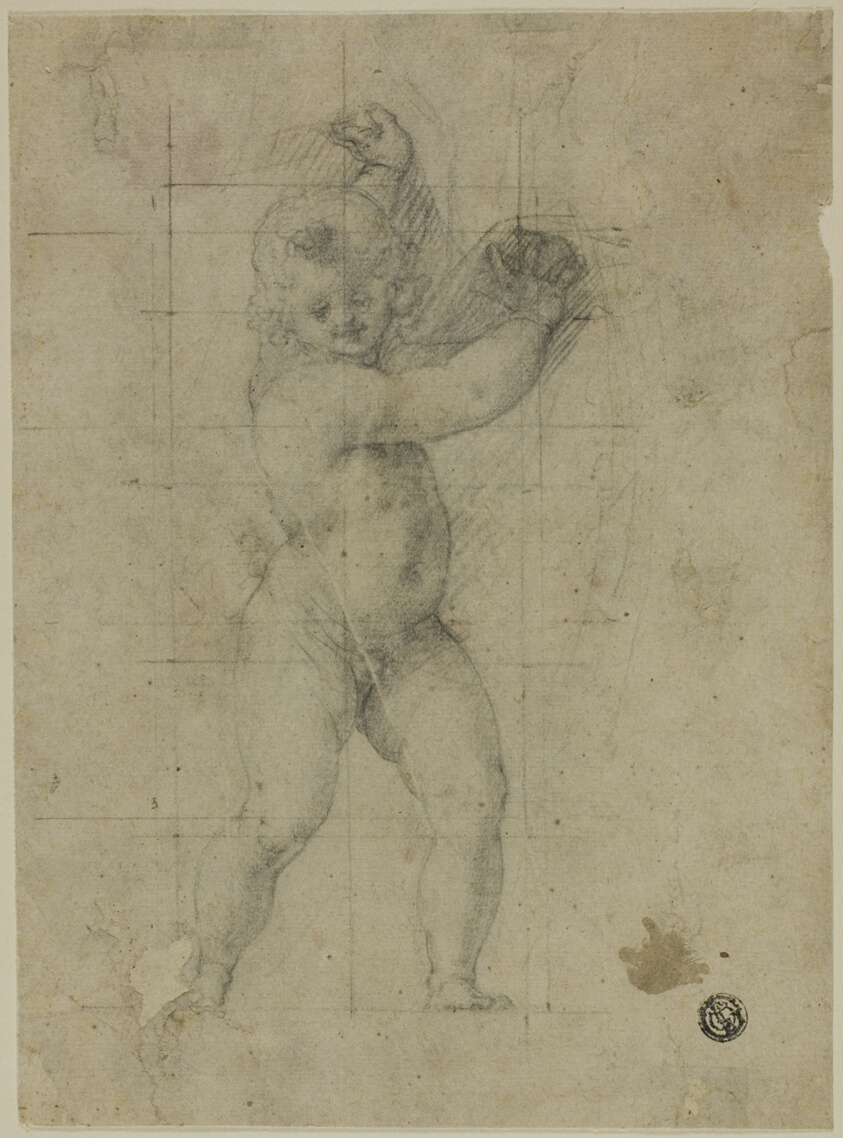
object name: Drawing and Watercolor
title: Putto with Raised Arms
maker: Cristofano Roncalli, called Il Pomarancio; Italian, 1552-1626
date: 1580/90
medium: Black chalk on ivory laid paper, squared in black chalk, laid down on cream laid paper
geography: Italy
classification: chalk; drawings (visual works); prints and drawing